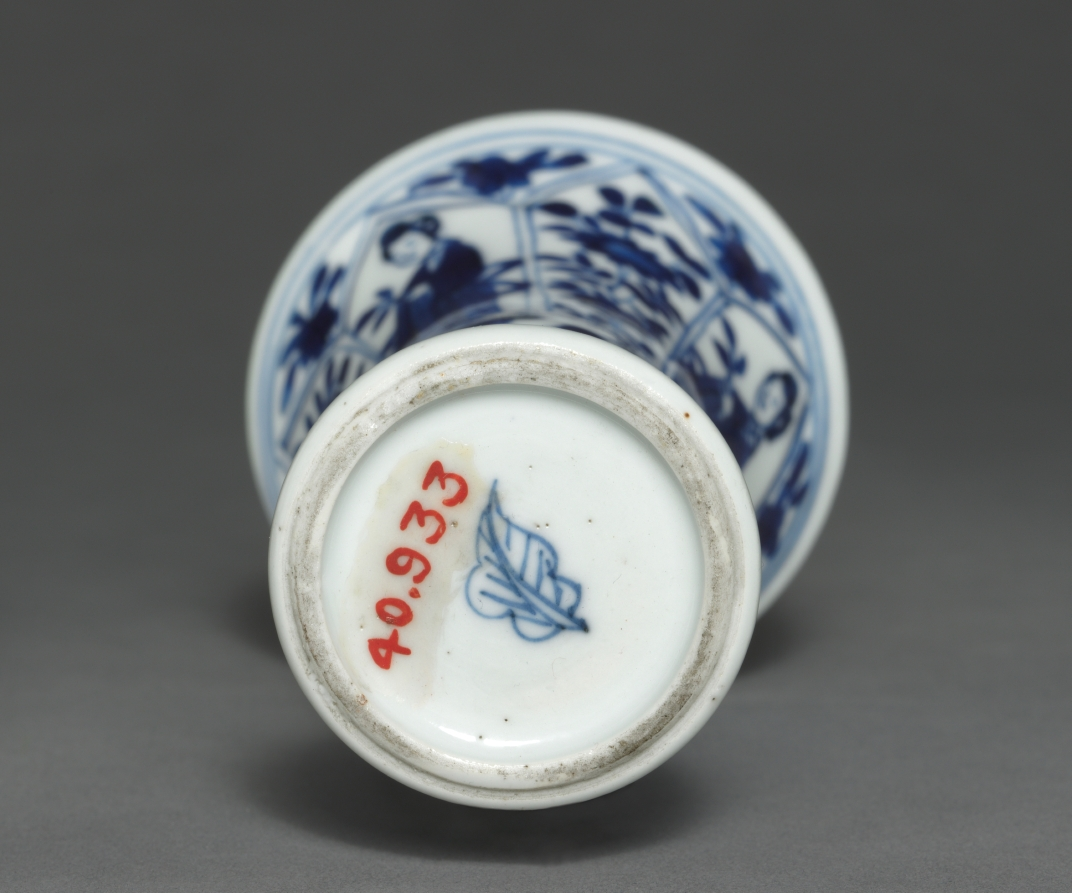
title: Beaker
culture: China, Qing dynasty (1644-1911), Daoguang reign (1821-1850) - Xianfeng reign (1851-1861)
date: 19th Century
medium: porcelain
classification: Ceramic